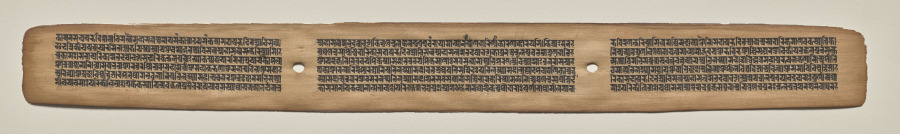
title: Text, Folio 176 (recto), Manuscript of the Perfection of Wisdom in Eight Thousand Lines (Ashtasahasrika Prajnaparamita-sutra)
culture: Eastern India, Bihar, Vikramashila Monastery. Painting: Nepal, Kathmandu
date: Sunday, September 14, 1119 (year 239 of the Newar Samvat in the month of Ashvina)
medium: gum tempera and ink on palm leaves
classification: Painting